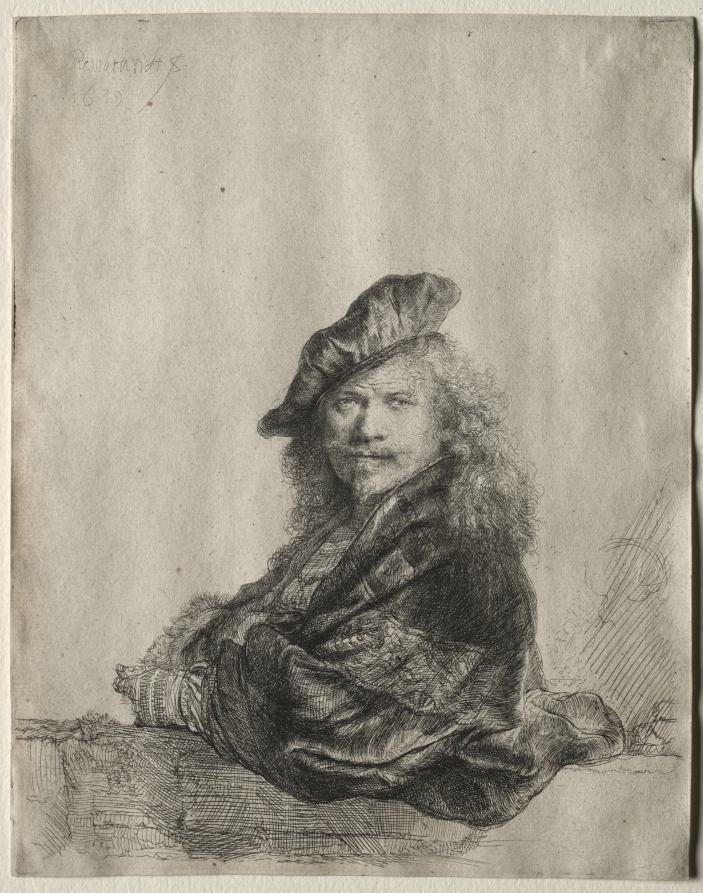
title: Self-Portrait Leaning on a Stone Sill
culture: Netherlands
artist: Rembrandt van Rijn (Dutch, 1606–1669)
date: 1639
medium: etching and drypoint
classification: Print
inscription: upper right, in plate: Rembrandt f / 1639 ; lower right, in pen and brown ink: C ; VERSO, upper center, in pen and brown ink: no 2[1?] ; upper center, in pen and brown ink: CXI.[XX?] ; lower left, in graphite: No 26. ; lower left, red chalk: no. 75 [crossed out]; lower center, in graphite: Daulby's sale; lower right, in graphite: 18 ; lower right, in graphite: 196 ; lower right, in pen and brown ink (faded): No. 26 a [J?]ar